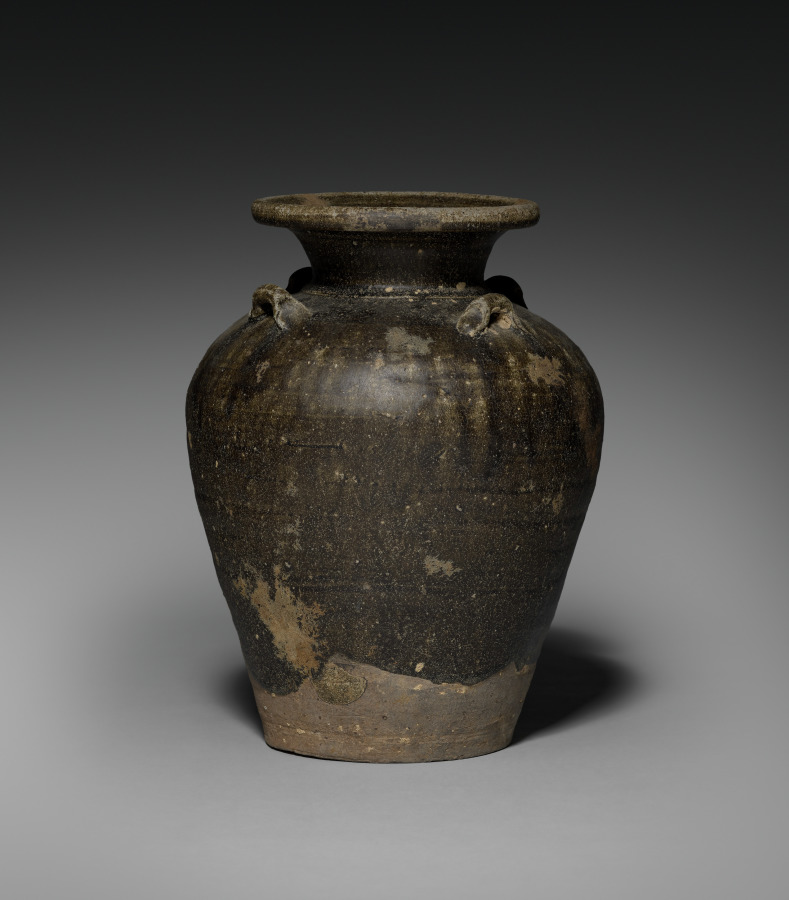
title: Storage Jar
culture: Thailand, Sawankhalok, 14th century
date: 1300s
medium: stoneware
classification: Ceramic